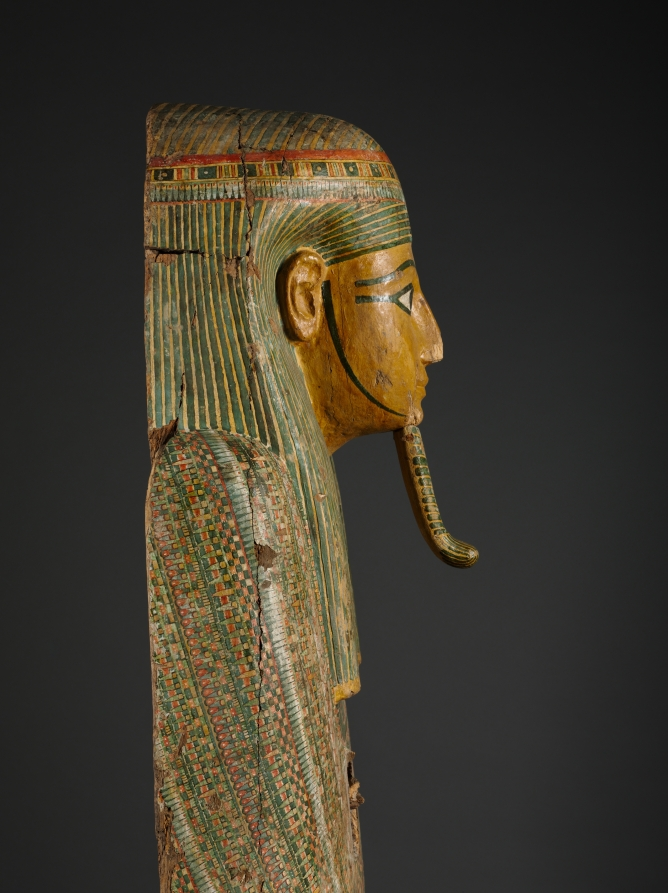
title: Coffin of Bakenmut (lid)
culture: Egypt, Thebes, Third Intermediate (1069–715 BCE), Dynasties 21–22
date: c. 1000–900 BCE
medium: gessoed and painted sycamore fig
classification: Funerary Equipment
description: The coffin of Bakenmut is one of the finest examples of painted wooden coffins made for the priests of Amen and their families at Thebes during Dynasty 21 and early Dynasty 22. The pharaohs of this time were no longer buried in the Valley of the Kings, but instead built tombs in the Delta, far to the north, where they resided. Security was lax in the Theban necropolis. The coffins and funerary goods of the wealthy citizens of Thebes were placed in unmarked and undecorated family tombs cut into the cliffs on the west bank of the Nile. All the care and detail that in more prosperous times were devoted to the decoration of the tomb chapel were now lavished on the elaborately painted coffins. Every available surface is crowded with religious scenes, images of funerary gods and goddesses, protective spells, and magical symbols. The deceased appears mummiform. An elaborate floral collar entirely covers the upper body, exposing only the separately attached hands (now lost). A pair of red "mummy braces" are crossed over the chest, their point of intersection marked by a winged sun disk. The lower body is covered with tiny figures modeled in gesso against a yellow background, which gives the effect of gold inlaid with glass or semiprecious stone. The decoration on the interior features two deified dead kings of Dynasty 18. Although these rulers had lived centuries before, memory of their greatness was still very much alive. The main scene near the top depicts Tuthmosis III, the great military pharaoh, who lived 500 years before Bakenmut. Posed as a mummy, the ruler wears a brilliant feathered garment enfolding him with falcon’s wings. The scene below features back-to-back seated images of Amenhotep I, regarded as the patron of the Theban cemetery and worshiped as a local god there.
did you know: Originally another smaller coffin was placed inside this outer coffin and in that the deceased with a mummy board would have rested.